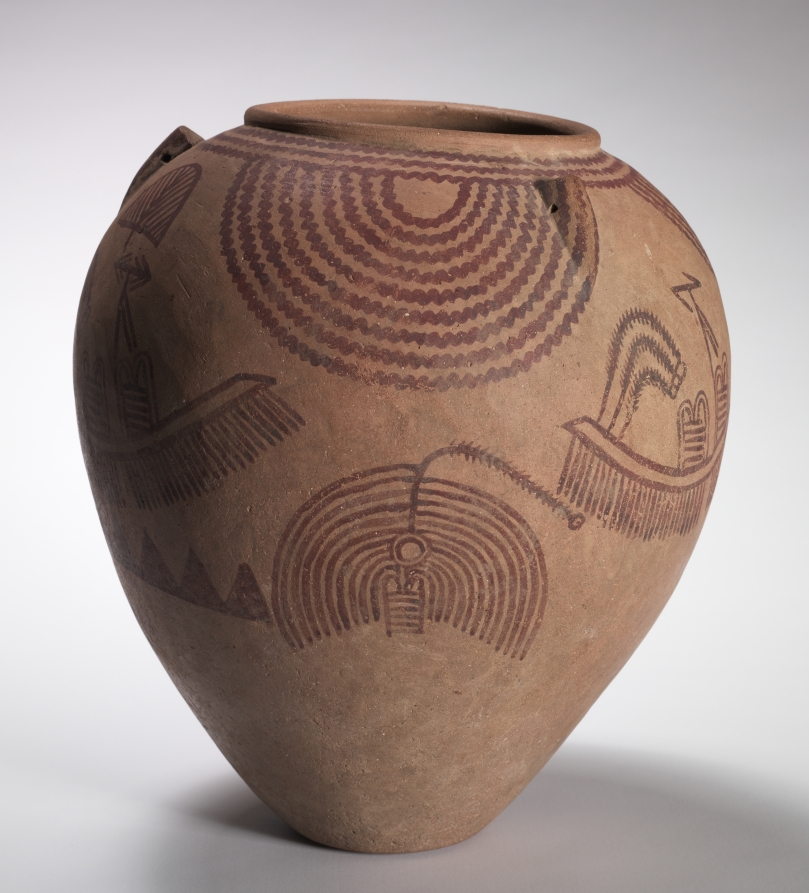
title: Decorated Jar with Boat Scenes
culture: Egypt, Predynastic (5000–2950 BCE), Naqada IIc–d (3650–3300 BCE)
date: c. 3300–3100 BCE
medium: marl clay pottery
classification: Vessels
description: The decoration painted on this jar shows two multi-oared boats traveling through fertile riverbanks lined with trees and aloe bushes. Rows of triangles indicate the desert hills in the background. The Nile was Egypt’s primary means of transportation and communication, since river traffic was far more efficient than travel by land. The concept of boat travel permeated all aspects of Egyptian life and religion. The sun god Ra was believed to travel by boat across the heavens by day and through the underworld by night. Funerary texts describe the trip to the afterlife as a journey by boat, and scenes of boats figured prominently in tomb decoration.